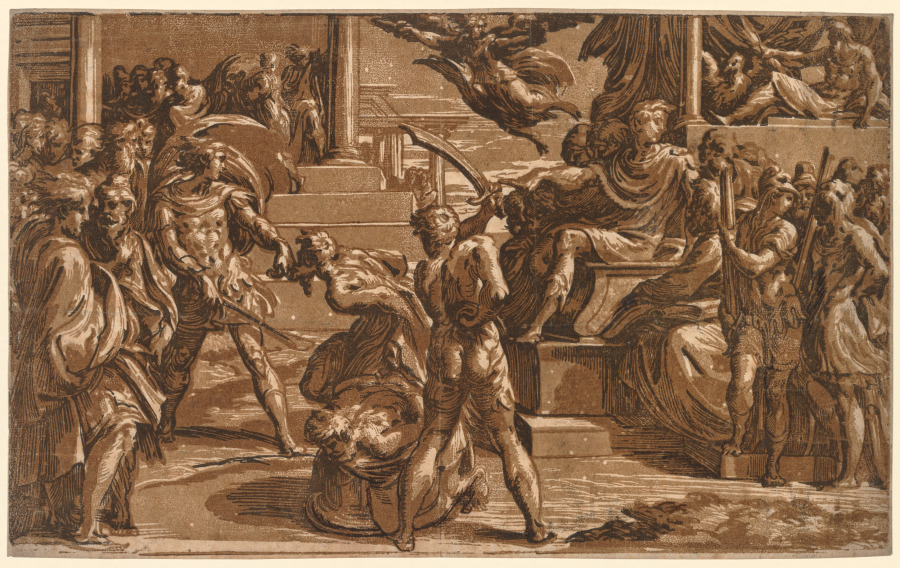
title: The Martyrdom of St. Peter and St. Paul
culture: Italy, 16th century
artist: Antonio da Trento (Italian, c. 1508–c. 1550)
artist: after Parmigianino (Italian, 1503–1540)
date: c. 1527–1530/1531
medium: chiaroscuro woodcut (in two shades of brown and black)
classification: Print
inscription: VERSO, center, in graphite: 7 ; lower left, in graphite: B XII 79 28 ; lower right, in graphite: C11638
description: The workshop of Parmigianino was one of the chief centers of chiaroscuro printmaking in the 1500s. Antonio da Trento, Parmigianino's student in Bologna from 1527 to 1531, made several chiaroscuro prints after his master's drawings. This print, considered da Trento's first collaborative effort with Parmigianino, was based on a drawing executed in Rome between 1524 and 1527 for a potential papal commission. It shows the imminent beheading of saint Paul, kneeling in the foreground, and the forthcoming crucifixion of Saint Peter, dragged away by his long beard by an executioner. According to tradition, the martyrdom of these two saints was ordered by the Roman Emperor Nero on the same day.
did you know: The Martyrdom of St. Peter and St. Paul is the only three.block print that Antonio da Trento produced in Bologna between 1527 and 1530, as well as the most ambitious in scale and conception.